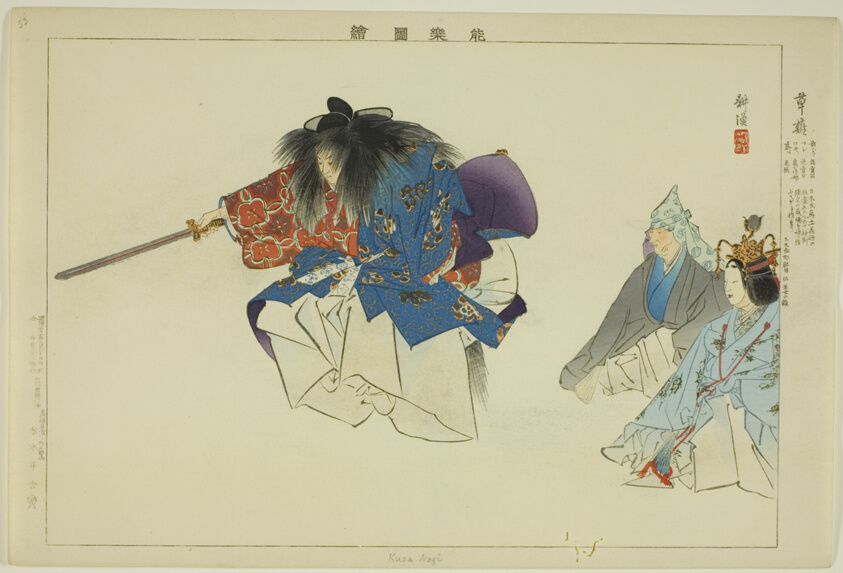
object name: Print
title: Kusa Nagi, from the series "Pictures of No Performances (Nogaku Zue)"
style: Japanese (culture or style)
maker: Tsukioka Kogyo; Japanese, 1869-1927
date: 1898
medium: Color woodblock print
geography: Japan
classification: woodblock print; print; asian art